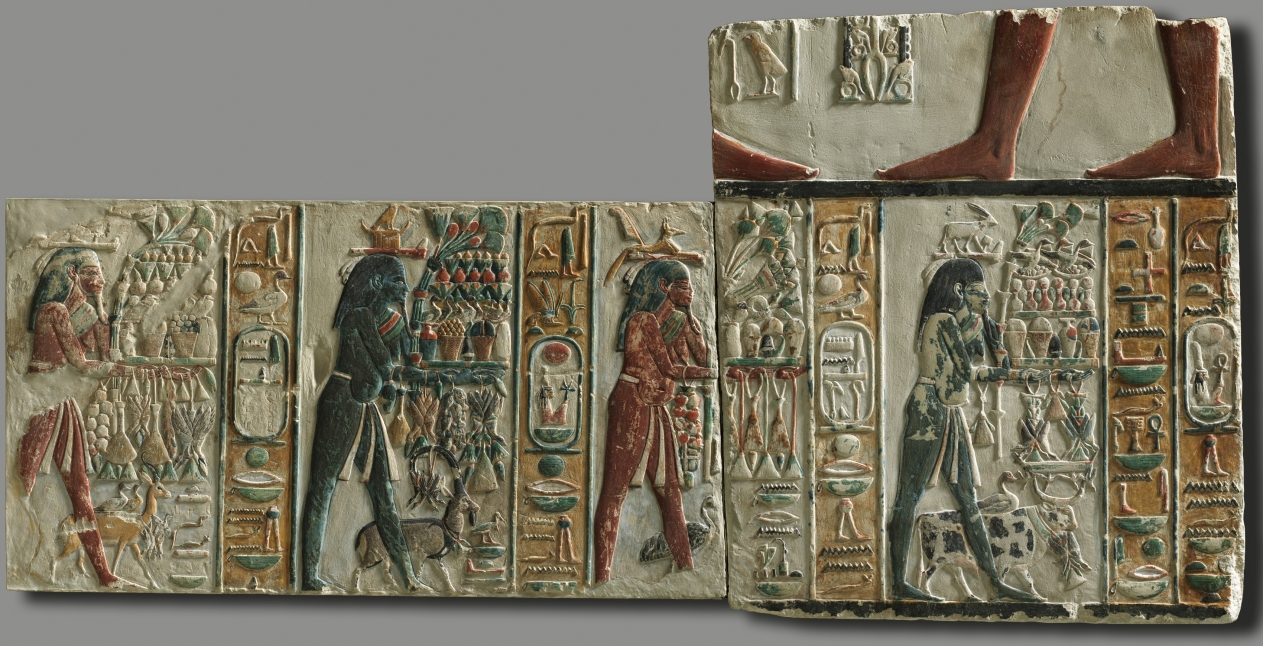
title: Nome Gods Bearing Offerings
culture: Egypt, New Kingdom (1540–1069 BCE), Dynasty 18, reign of Amenhotep III (1390–1352 BCE)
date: c. 1391–1353 BCE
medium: painted limestone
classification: Sculpture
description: These blocks from a temple wall show four figures identified as nomes, or provinces, of ancient Egypt. Carrying trays heaped with offerings and leading sacrificial animals, they personify the bounty of the land that they bring to the god who stood in the upper register, facing a figure of the king, Amenhotep III. These blocks may be from Amenhotep III's temple, dedicated to the god Horus.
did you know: Another block from the same temple wall was acquired 15 years later by the museum.